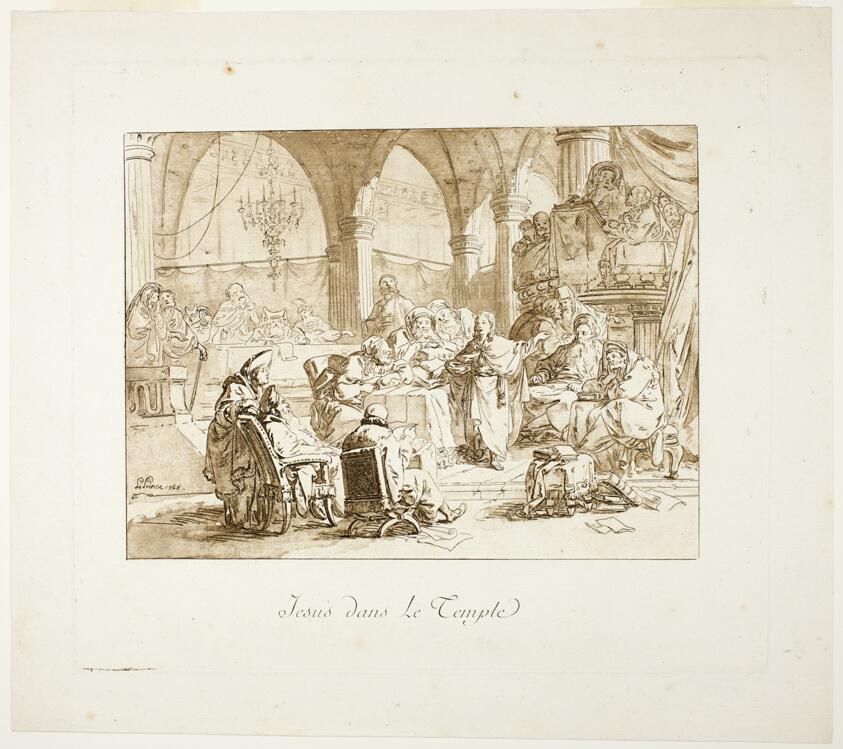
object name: Print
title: Jesus in the Temple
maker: Jean-Baptiste Le Prince; French, 1734-1781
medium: Aquatint and etching on off-white laid paper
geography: France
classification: aquatint; print; prints and drawing